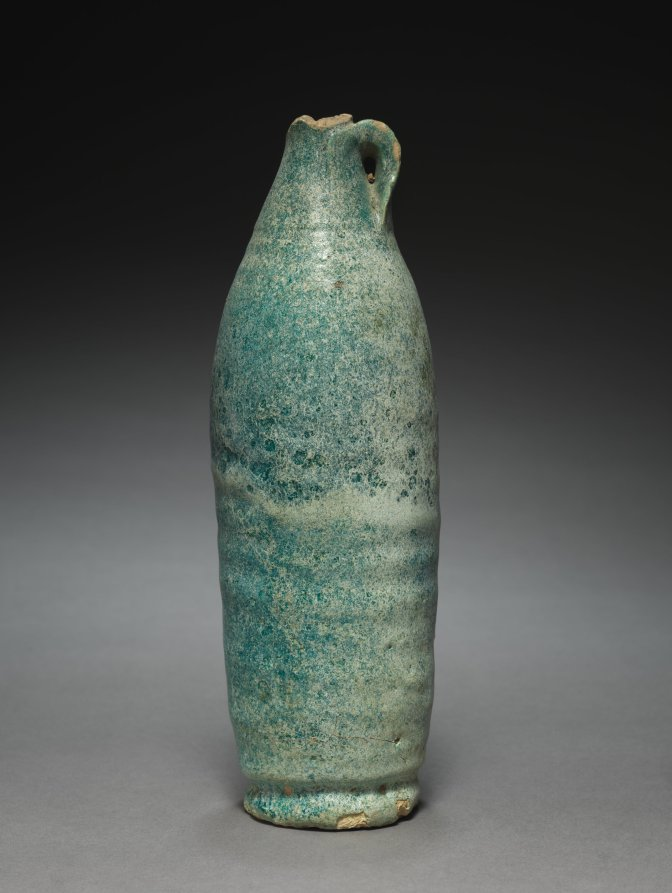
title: Vase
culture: Parthian Empire (247 BCE–224 CE)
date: 1–200 CE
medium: terracotta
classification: Ceramic